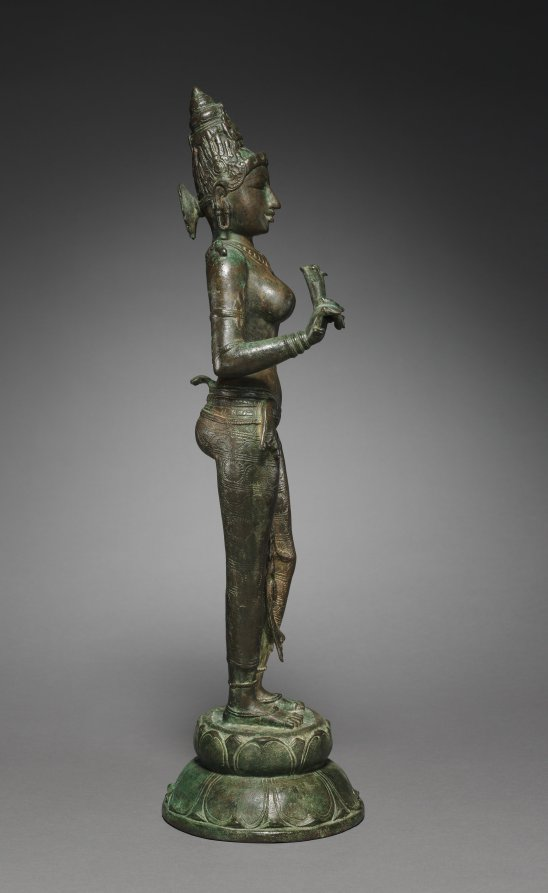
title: Goddess Holding a Lotus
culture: South India, Tamil Nadu, Chola period (900-13th Century)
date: c. 950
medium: bronze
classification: Sculpture